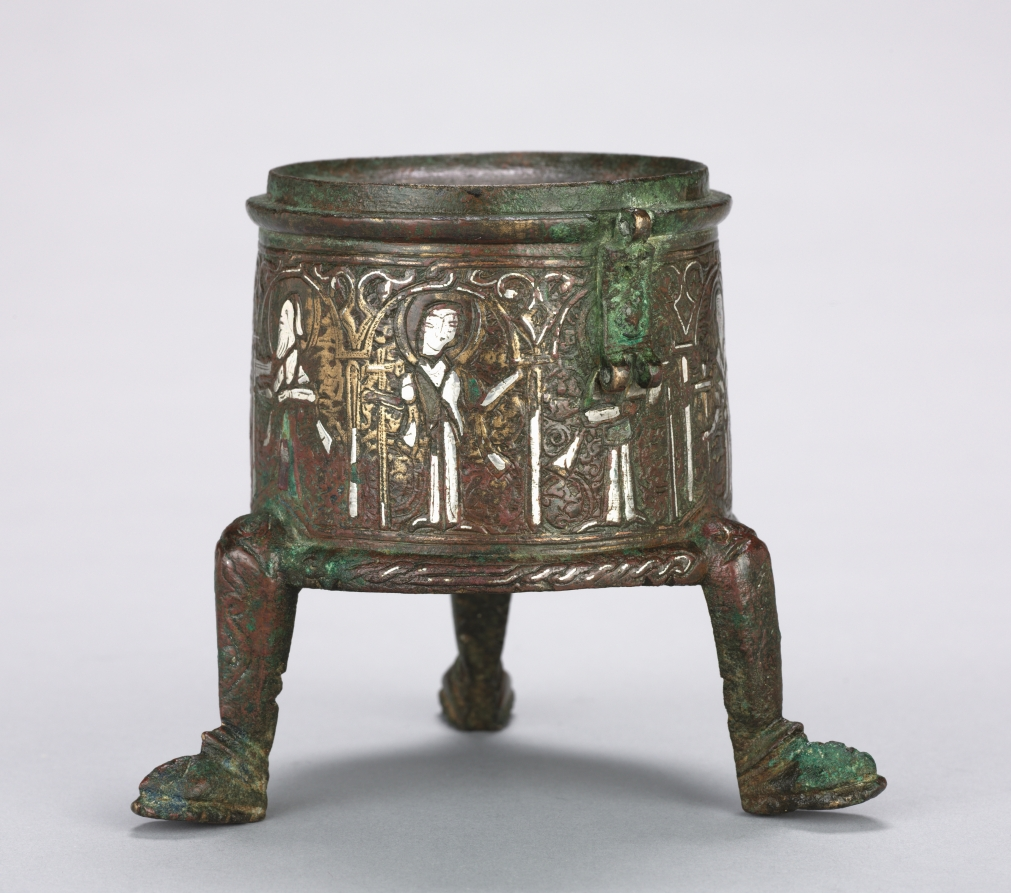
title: Incense Burner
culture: Syria, Ayyubid Period, 13th Century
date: 1200–1250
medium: brass inlaid with silver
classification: Metalwork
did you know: This footed vessel is wearing shoes.